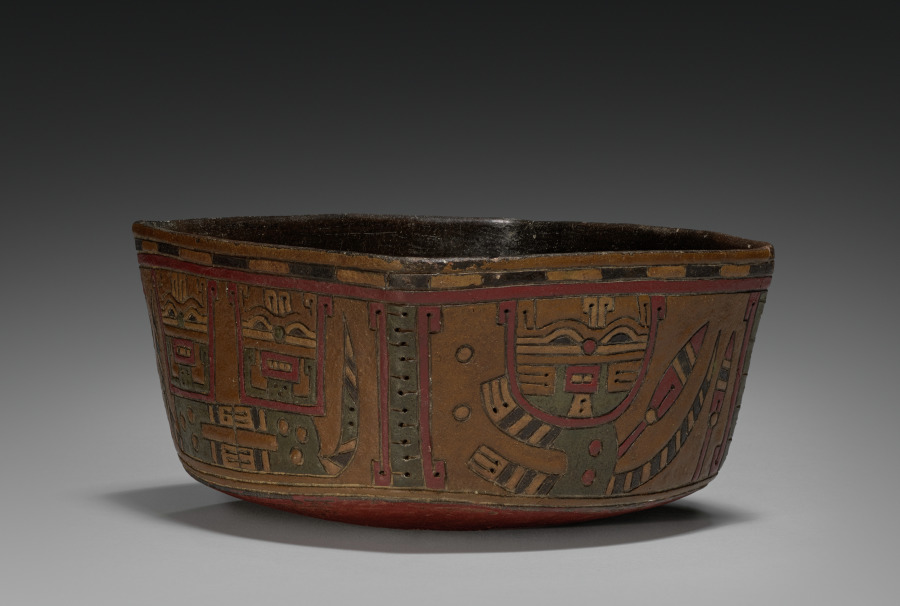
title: Square Bowl with Pampas Cats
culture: Central Andes, South Coast, Paracas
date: 500–400 BCE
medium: Ceramic, post-fire paint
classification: Ceramic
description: The Paracas often decorated their ceramics with geometricized representations of the native Pampas cat, a small, reclusive, wild feline that lives on the margins of agricultural fields, where it preys on the rodents and other pests that are a farmer’s bane. Thus, the ancients seem to have linked it to nature’s fertility and, by extension, human prosperity and continuity.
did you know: The animal shown on this bowl is the Pampas cat, a small, wild feline.